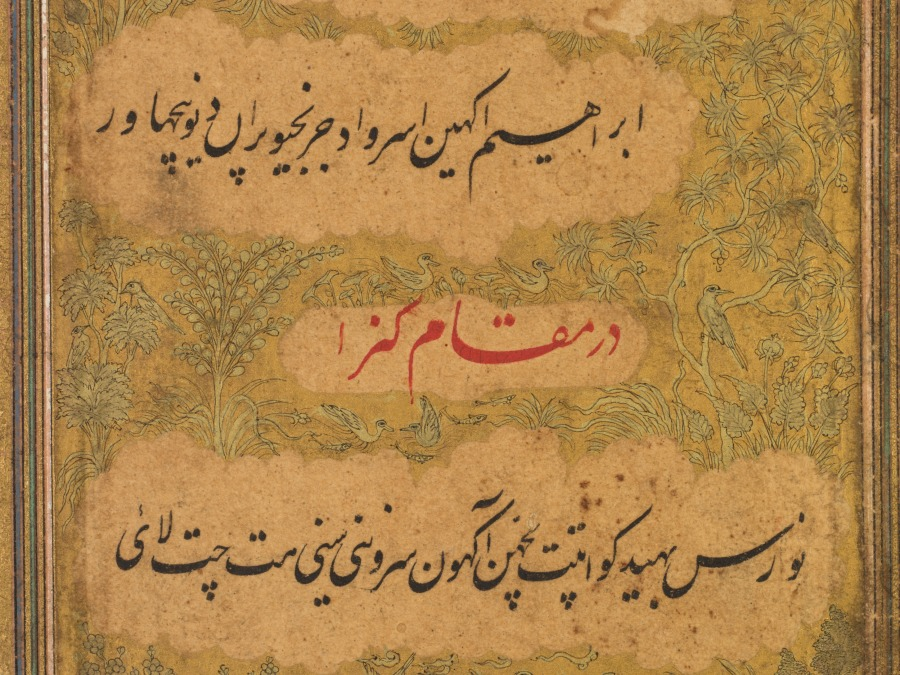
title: From Dohras (Songs) 40 and 42 from the Kitab-i Nauras (Book of Nine Essences) of Sultan Ibrahim Adil Shah II of Bijapur (r. 1580–1627) (recto)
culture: India, Bijapur, Deccan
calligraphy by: Khalilullah Butshikan (Persian, active in India 1596–c. 1620)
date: 1618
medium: ink with two-tone gold on paper, double-sided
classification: Painting